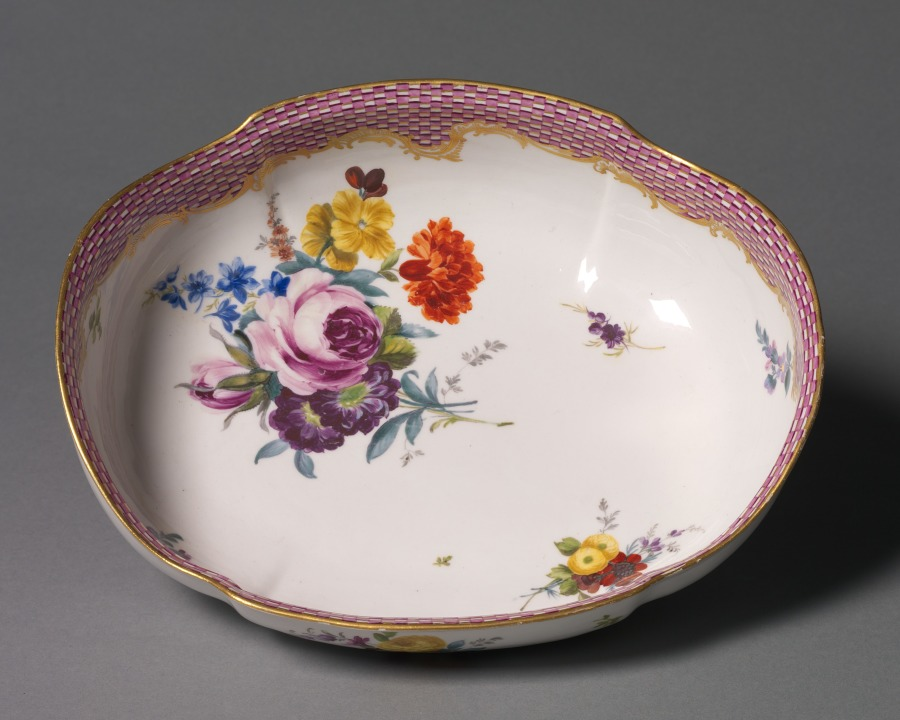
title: Basin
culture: Germany, Meissen, 18th century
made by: Meissen Porcelain Factory (German, est. c. 1710)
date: c. 1765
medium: porcelain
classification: Ceramic